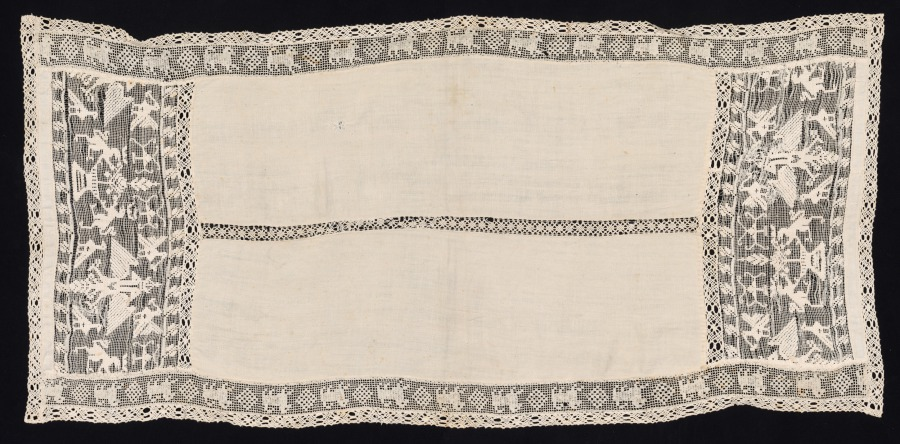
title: Cloth with Border of Crowned Double-Headed Eagles with Various Emblems, Birds, and Other Animals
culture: Italy, 1800s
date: 1800s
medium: Bleached linen (est.): needle lace, burato (twined ground and darned in two directions), bobbin lace insert and edging, and crochet insert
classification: Lace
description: A range of techniques were used to create textural variation in this lace cloth: buratto, bobbin, and crochet. Figural motifs appear within the inserted buratto bands. Different birds, with crosses visible on their chests, crowned double-headed eagles, and feline figures facing a vessel may allude to the heraldic symbols of a particular family.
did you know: This cloth was given to the museum by Louise Tifft Brown, a native Clevelander who became an expert in lace while living in Venice for 35 years.